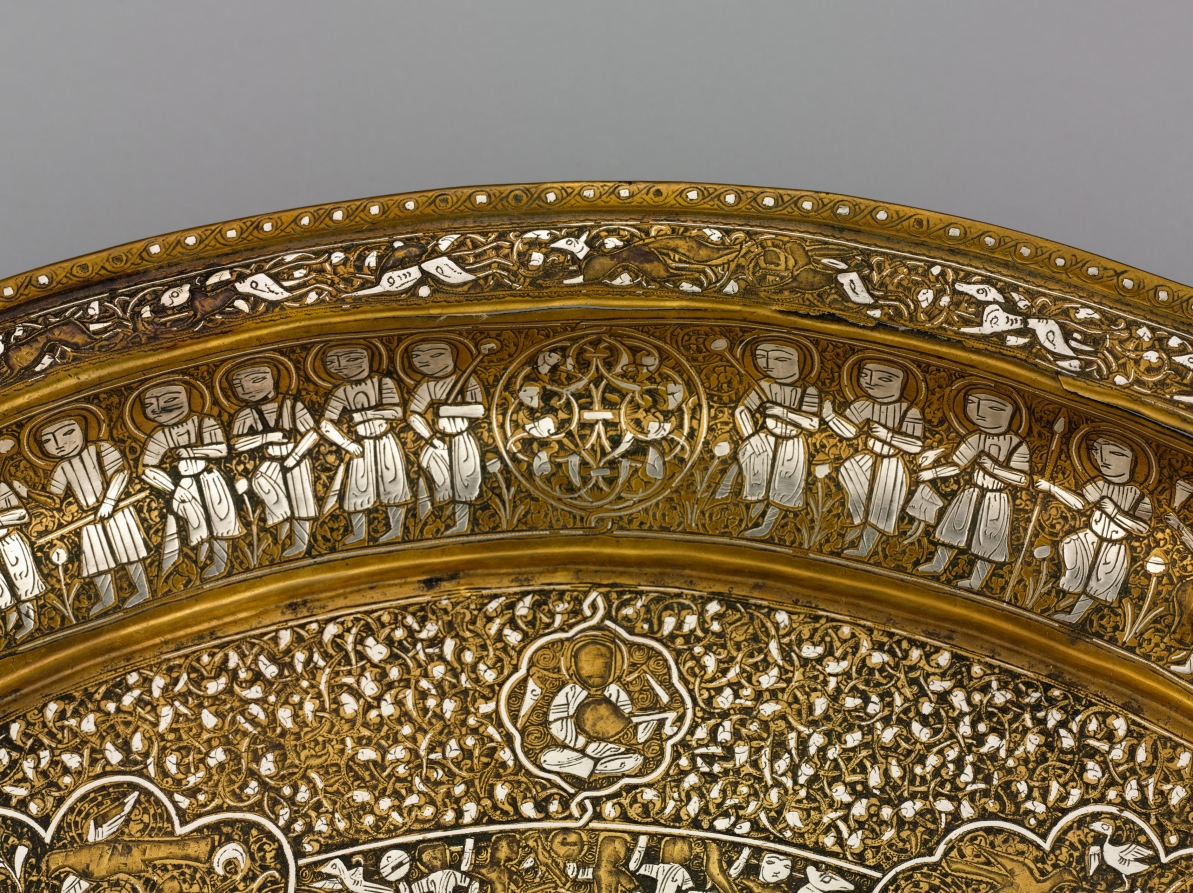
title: Tray Portraying Courtly Pleasures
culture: Syria, Ayyubid period (1171–1260)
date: 1240s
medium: sheet brass inlaid with silver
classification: Metalwork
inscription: The presence of ligatures in the narrow circular bands with interconnected human and animal figures suggests this may be a degenerate form of animated script. It is indecipherable.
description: This tray features images of courtly life interspersed with astronomical symbols. The scenes contained within large multilobed medallions display an enthroned prince with lions at his feet, a banquet, a hunt, dancers, and musicians. Contained within the concentric circles there are also references to solar and lunar motifs, including figures holding sunbursts and lunar crescents. This tray is made of a single sheet of brass and the silver inlay, which is best preserved on the tray’s inner curve, suggests its original brilliance.